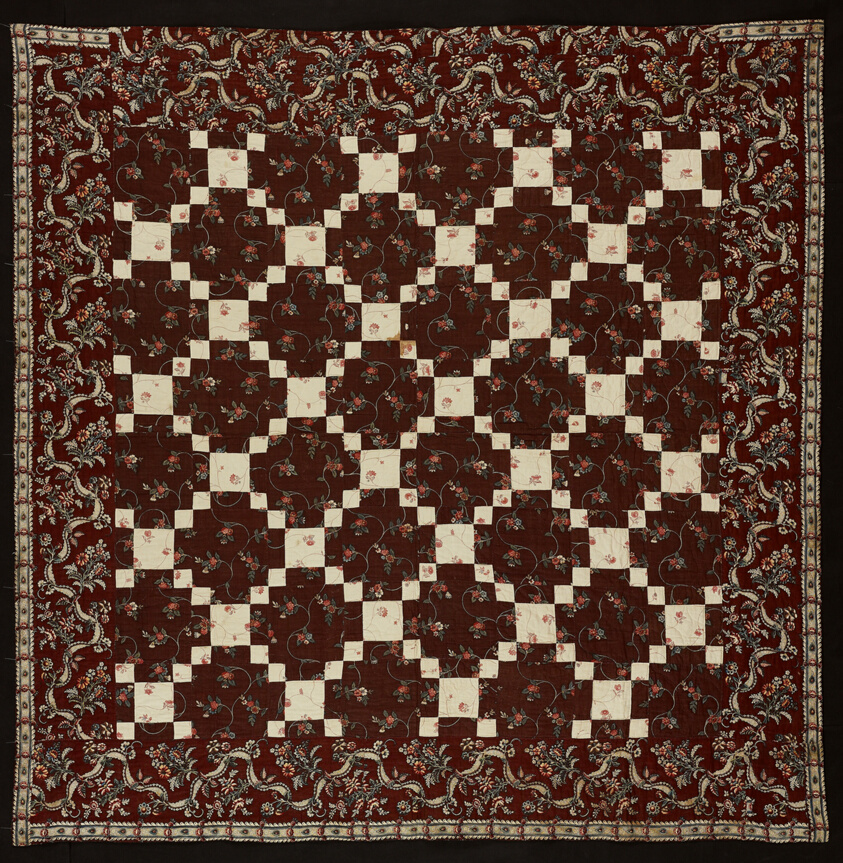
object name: Textile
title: Bedcover (Nine Patch Quilt)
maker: Mid-Atlantic or New England region, United States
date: c. 1815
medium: Cotton, various plain weaves; block-printed and roller-printed; pieced; lined with cotton, various plain weaves; block-printed; pieced; quilted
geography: United States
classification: needlework - quilt; textile